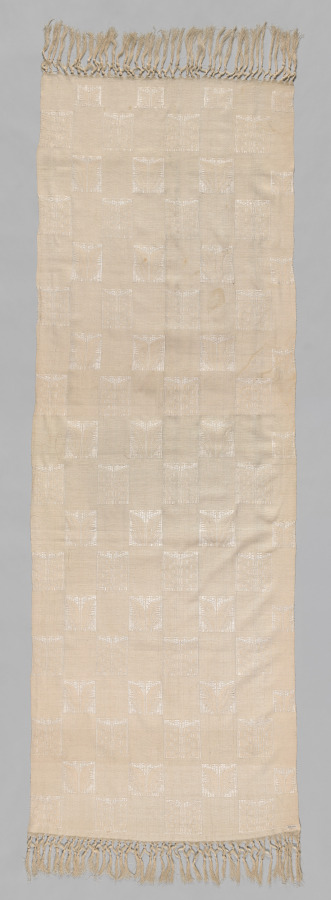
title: One of a pair of shawls (Lamba Landy Fotsy)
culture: Africa, East Africa, Madagascar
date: 1900s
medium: Silk (Bombyx mori and Borocera cajani)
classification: Textile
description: A lamba is an untailored textile worn by all ages, classes, and genders across much of Madagascar. This is an example of a woman’s garment made after Queen Ranavalona II made Christianity the state religion of the Merina Kingdom. Soon after, all-white lamba became popular for both Sunday church and daily wear. Fotsy is white in the Malagasy language. Indicating its owner’s worldliness, the white-on-white patterns alluded to fashionable imported textiles with damask patterns.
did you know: Invented in the mid-1800s, shawls like this were popular until about 2000.